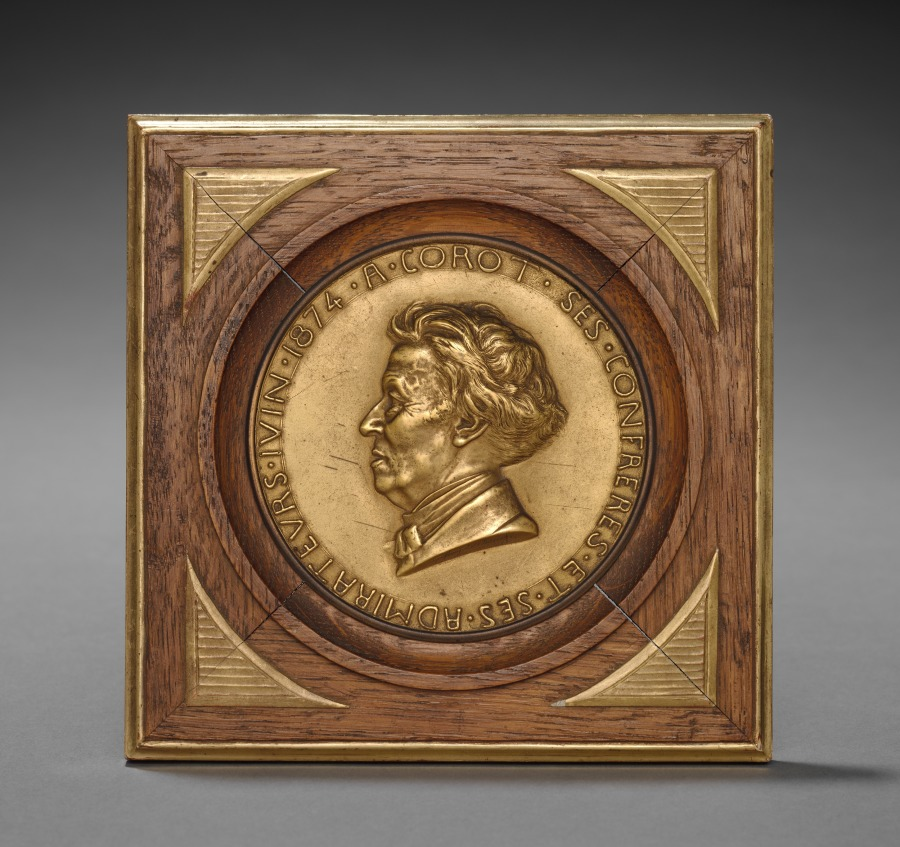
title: Medal of Corot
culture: France, 19th century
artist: Adolphe-Victor Geoffroy-Dechaume (French, 1816–1892)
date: 1874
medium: gilt bronze, wood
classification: Sculpture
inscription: Signed on cut of neck in ligature: "Geoffroy Dechaume". Obverse inscribed: "A.COROT.SES.CONFRERES.ET.SES.ADMIRATEURS.IVIN.1874". Reverse inscribed: "TEMOIGNAGE.D'ADMIRATION.POUR.SON.OEUVRE.1822-1874.